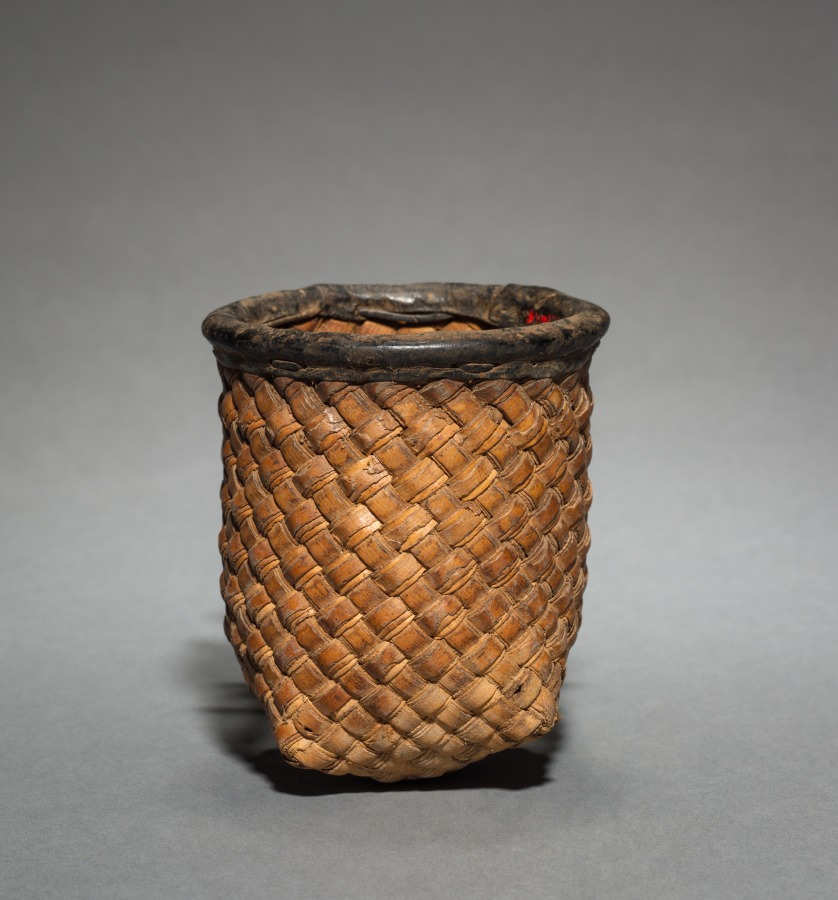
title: One of Ten Nesting Wedding Baskets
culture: Africa, Western Sudan, Burkina Faso, Lobi, 20th century (?)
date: c 1900s ?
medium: Plant fiber and leather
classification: Vessels